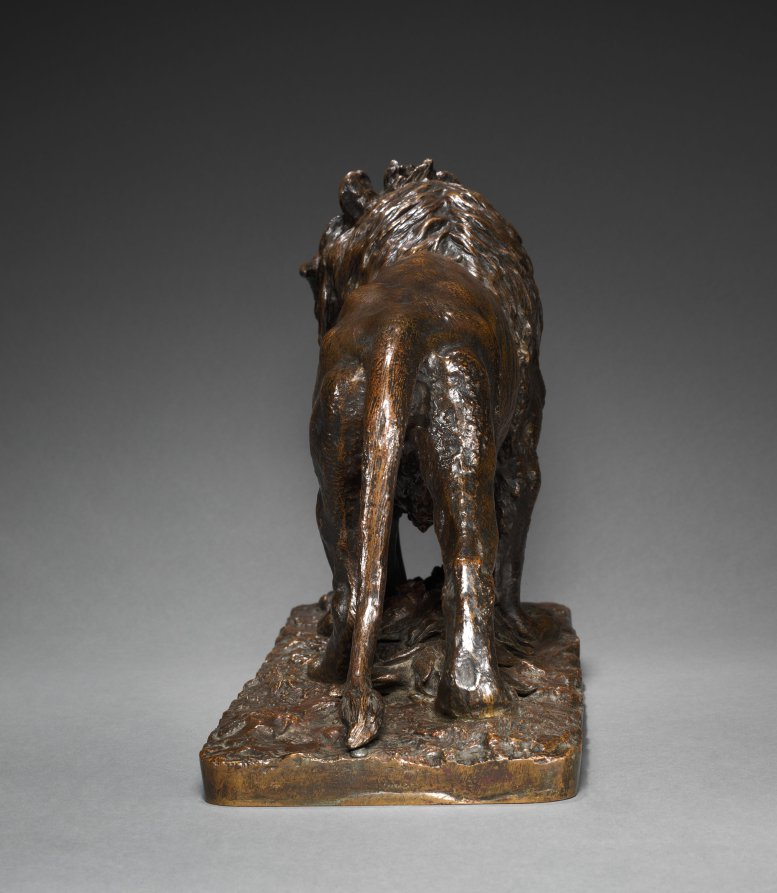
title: Standing Lion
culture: France, 19th century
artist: Christophe Fratin (French, 1801–1864)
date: c. 1837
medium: bronze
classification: Sculpture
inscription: Signed near clump of foliage beneath lion: "Fratin"